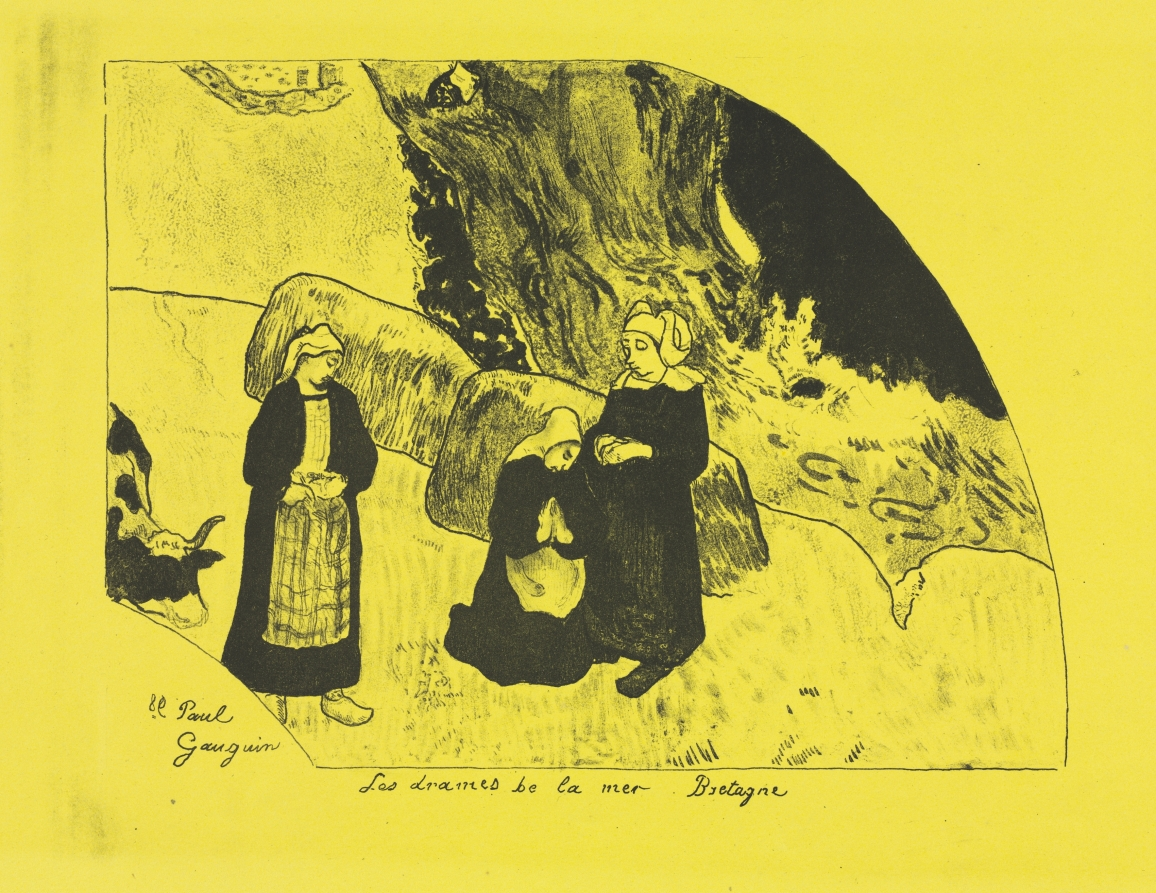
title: Volpini Suite: Dramas of the Sea: Brittany (Les Drames de la Mer, Bretagne)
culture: France, 19th century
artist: Paul Gauguin (French, 1848–1903)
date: 1889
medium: zincograph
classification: Print